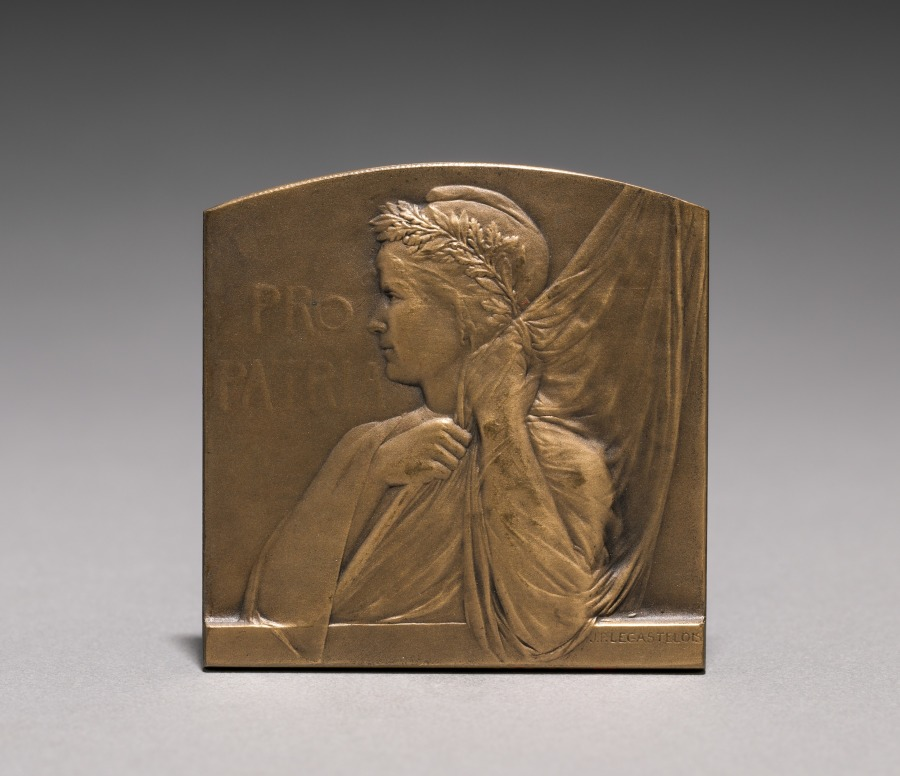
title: Medal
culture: France, 19th century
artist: Jules Prosper Legastelois (French, 1855–1931)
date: 1911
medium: bronze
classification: Metalwork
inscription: "Pro Patria."